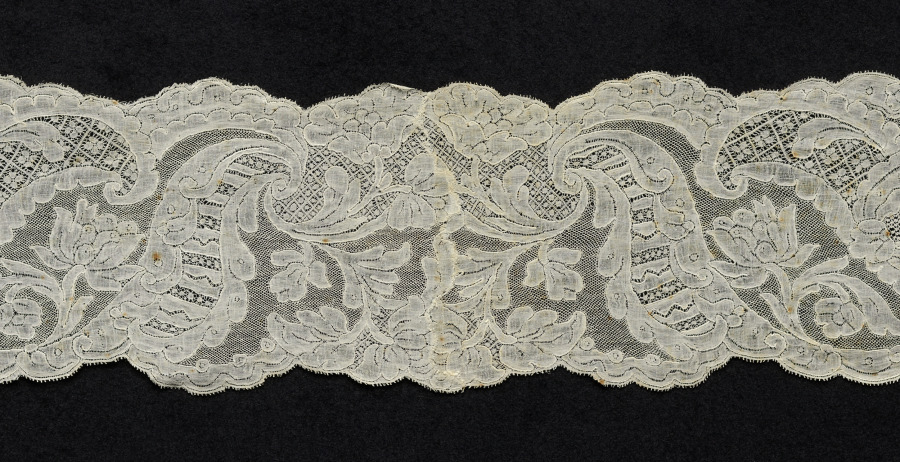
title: Lace Lappet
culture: Belgium, Mechelen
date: 1700s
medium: Linen: bobbin lace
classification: Lace